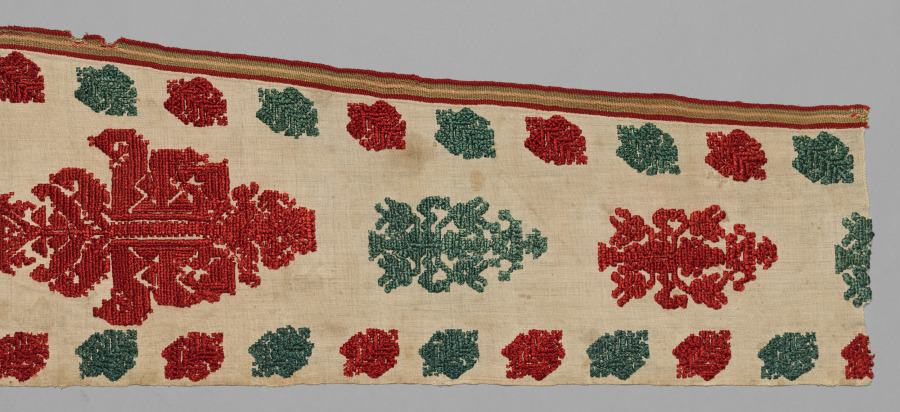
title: Portion of a Bed Tent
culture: Greece, Dodecanese Islands, Rhodes, 18th century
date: 1700s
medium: embroidery: silk on linen tabby ground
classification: Embroidery